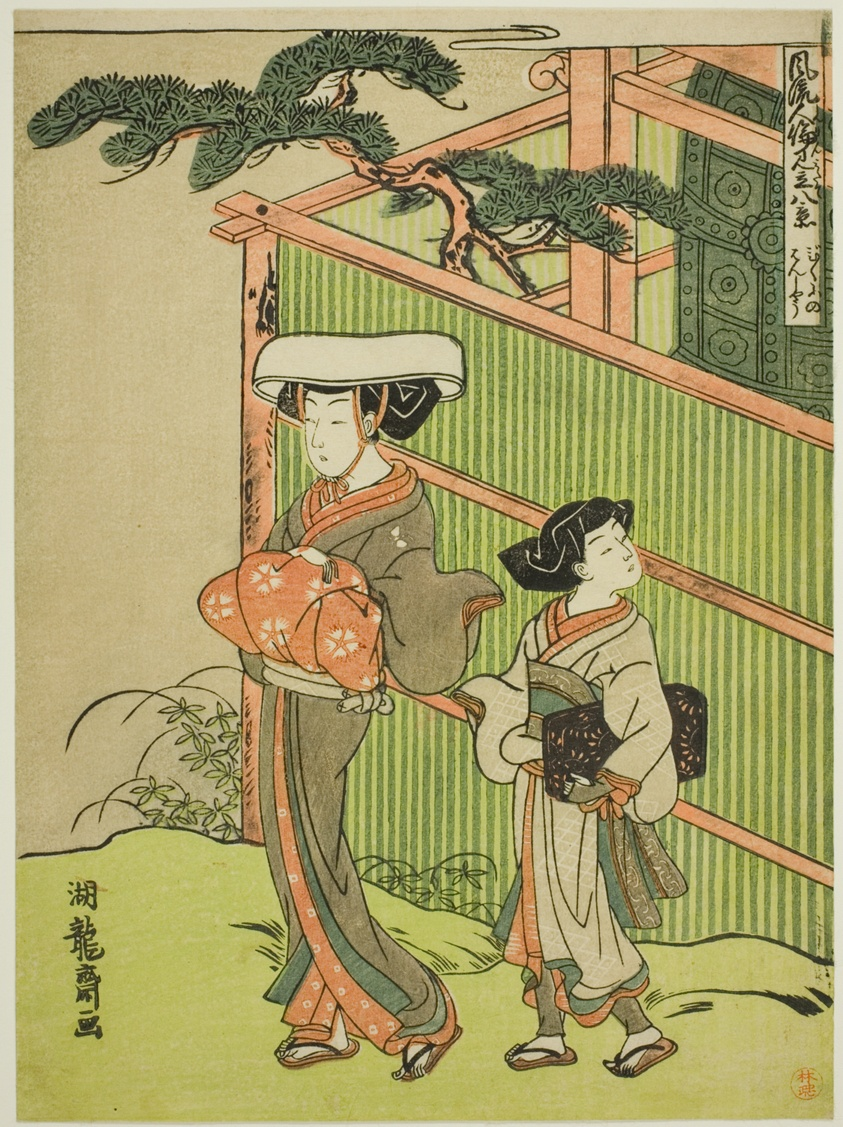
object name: Print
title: The Evening Bell of the Nun (Bikuni no bansho), from the series "Eight Views of Fashionable Human Relations (Furyu jinrin mitate hakkei)"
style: Japanese (culture or style)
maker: Isoda Koryusai (Japanese, 1735-1790)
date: c. 1770/72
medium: Color woodblock print; chuban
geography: Japan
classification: woodblock print; print; asian art